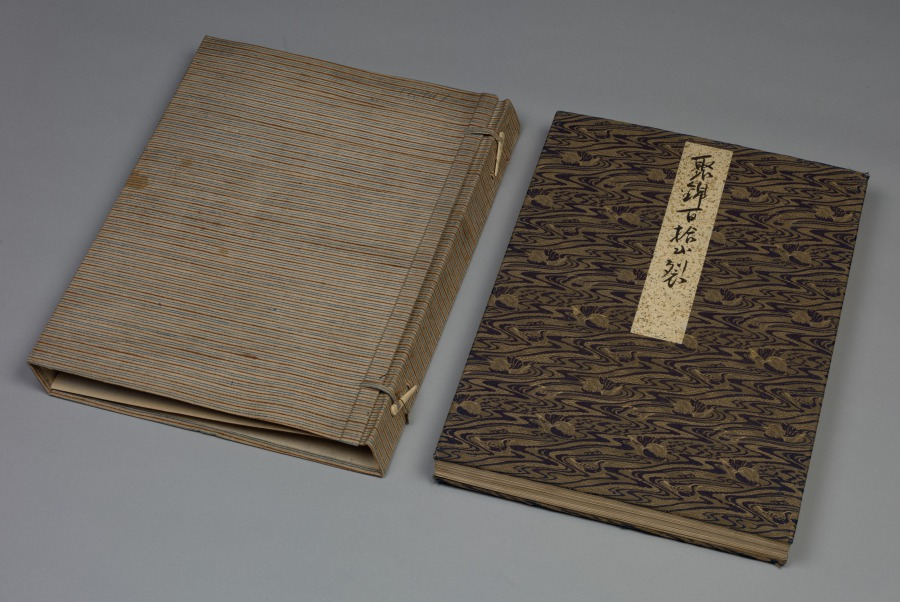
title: Album of Textile Samples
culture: Japan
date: 1790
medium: silk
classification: Textile